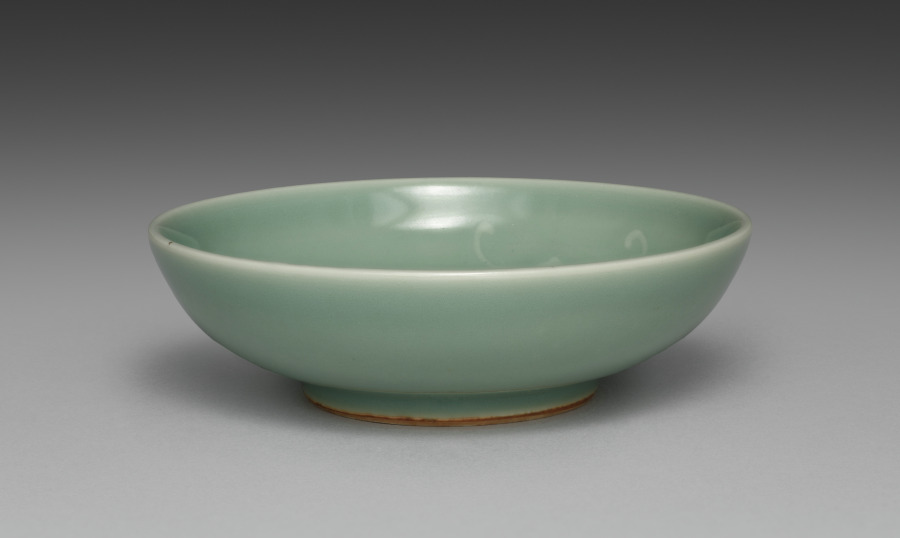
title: Dish from Dishes with Ivy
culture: Japan, Meiji period (1868–1912)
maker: Seifū Yohei III (Japanese, 1851–1914)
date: 1893–1914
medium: One from a set of five dishes; porcelain with green glaze and molded designs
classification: Ceramic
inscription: 清風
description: Yohei III’s main output for his sophisticated clientele was in the form of tea sets and dining sets. He often produced in pairs, sets of five, or sets of ten. This set of five dishes with a green glaze and designs of ivy vines in very low relief has unfortunately lost its box. These dishes are slightly larger than the other dishes, like CMA 2022.187, and so may have been not saucers but rather small plates for meals.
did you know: In his career, Seifū Yohei III created a range of dishes in green glazes.